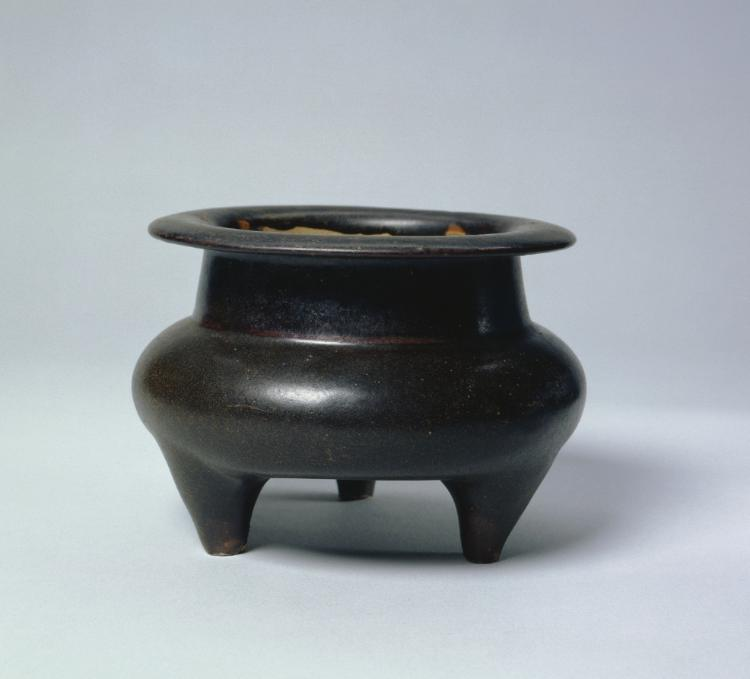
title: Incense Burner: Jizhou ware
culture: China, Jiangxi Province, Yonghe kilns, Jizhou, Jiangxi, Southern Song dynasty (1127–1279) to Yuan Dynasty (1271–1368)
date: 1200s–1300s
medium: glazed stoneware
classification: Ceramic